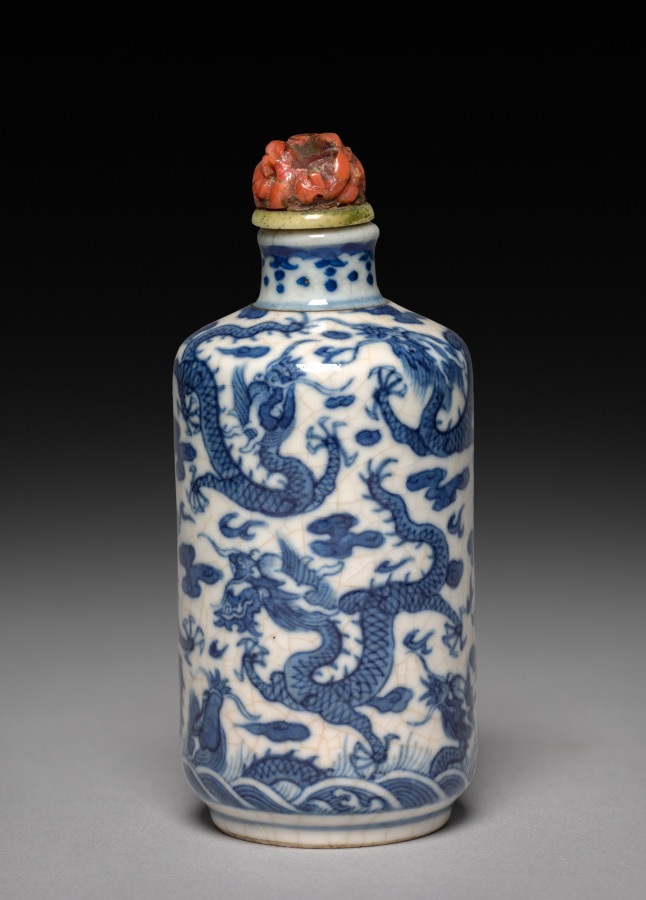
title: Snuff Bottle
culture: China, Qing dynasty (1644-1911), Kangxi reign (1662-1722)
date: 1662–1722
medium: porcelain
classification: Ceramic